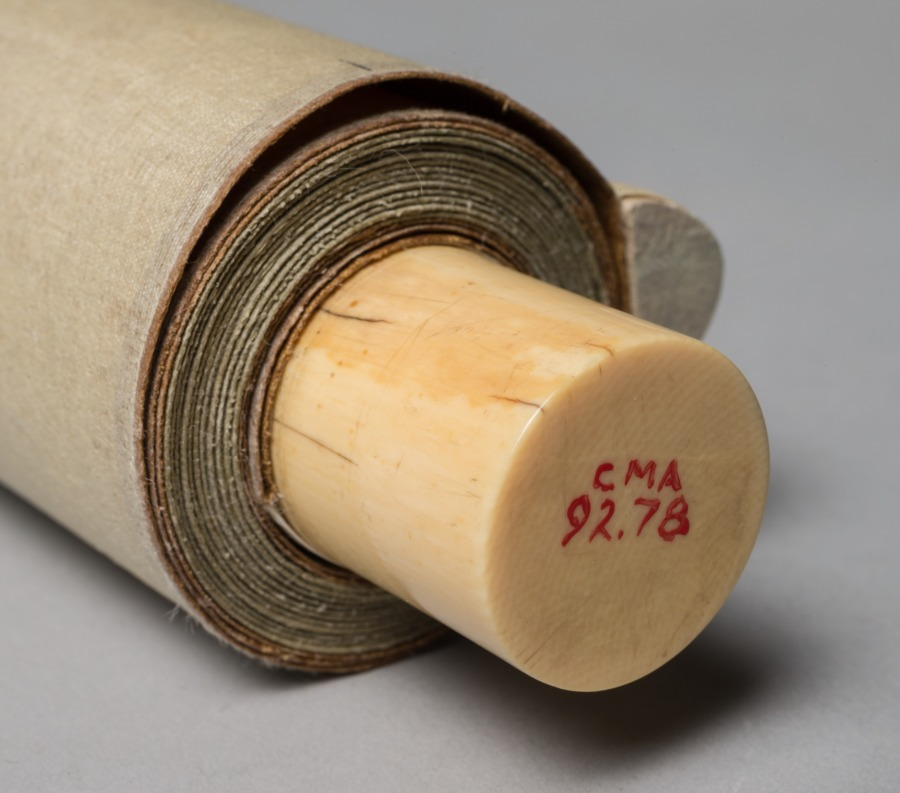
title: Minamoto no Nakakuni Visits Lady Kogō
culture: Japan, Edo period (1615–1868)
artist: Kiyohara Yukinobu (Japanese, 1643–1682)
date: late 1600s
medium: one of a triptych of hanging scrolls; ink and color on silk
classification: Painting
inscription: 款記「清原氏女雪信筆」/「清原女」朱文八角印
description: Kiyohara Yukinobu was one of Japan's earliest and most talented female painters. Kiyohara preferred Japanese-style painting techniques and subjects. Her work depicts the scenery and history of her native land. In addition to the tonalities of ink, she applied a delicate range of colors that help identify the seasons, an important theme in Japanese life and culture.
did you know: This nocturnal autumnal scene is the left part of a triptych presenting an episode from The Tale of the Heike.